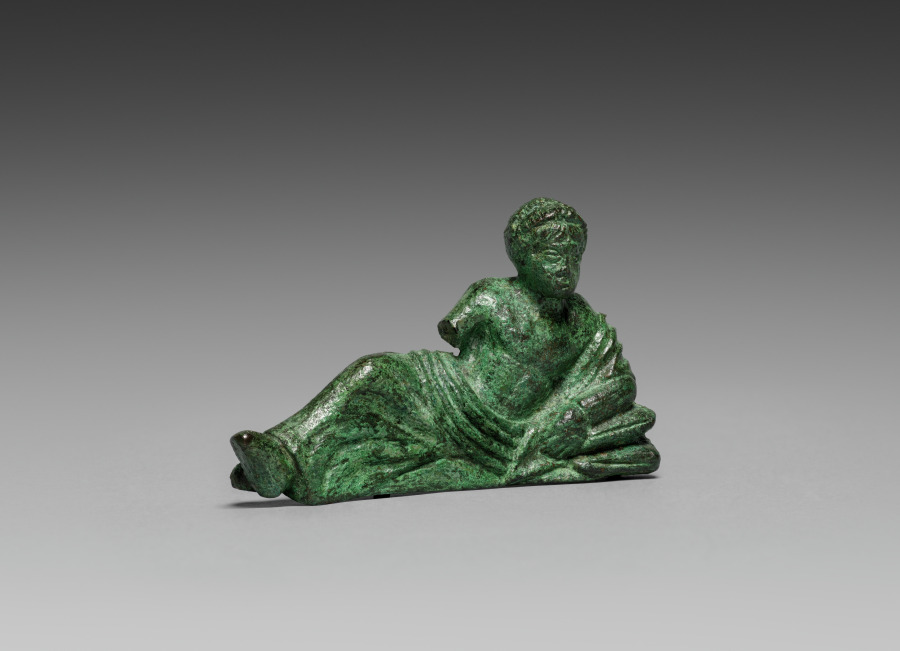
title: Vessel Ornament of Banqueter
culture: Etruscan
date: c. 400–375 BCE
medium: bronze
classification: Sculpture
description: This bronze banqueter figurine was one of six once adorning the rim of a large basin, now lost. Cast in molds with individualized details, most have grooves on their underside to attach to the basin. Minute traces of gilding remain on areas of clothing and skin (mostly visible only under magnification), suggesting that they may have been completely gilded. Two handles in the form of hippocampi, horses with serpentine tails, also belonged to the basin and are now displayed at the Michael C. Carlos Museum at Emory University. The basin may have been used to hold liquid for a banquet, or was perhaps funerary. This bronze figurine lies on his side in the posture of an ancient banqueter. His right arm is broken off but may once have rested on his hip. The figurine wears a garland on his head and a himation draped loosely around his left shoulder, revealing a muscular chest. One leg is raised over the other and a foot is exposed. Specks of gilding remain on the chest and head, but is different in color than that on the other five figurines. Also unlike the others, this one bears a visible seam across its entire length and has no groove underneath.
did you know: This reclining male banqueter demonstrates the posture of symposium guests.